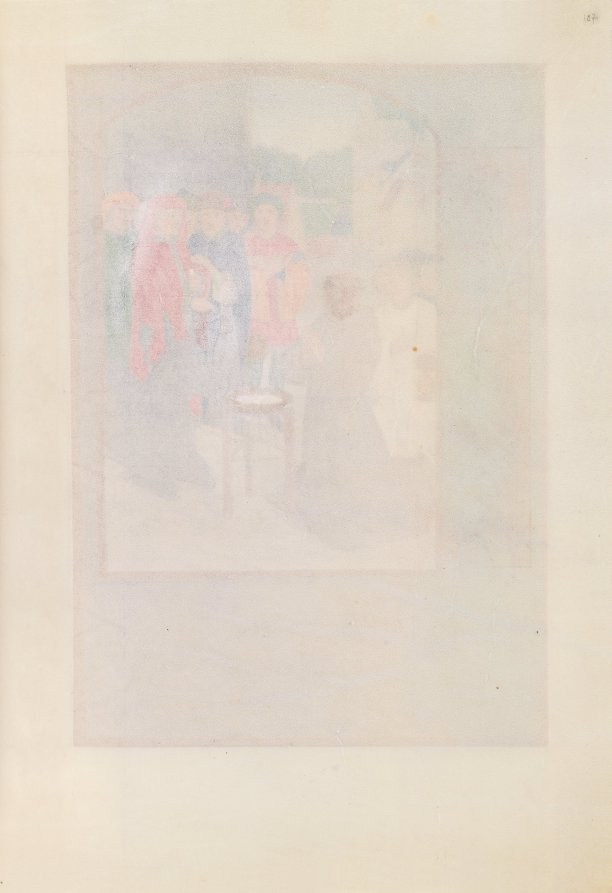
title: Hours of Queen Isabella the Catholic, Queen of Spain: Fol. 187r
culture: Flanders, Ghent and Bruges, late 15th century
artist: Master of the First Prayerbook of Maximillian (Flemish, c. 1444–1519)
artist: and Associates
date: c. 1500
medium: ink, tempera, and gold on vellum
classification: Bound Volume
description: This manuscript was illuminated by a circle of at least five highly organized manuscript painters active in the Flemish cities of Ghent and Bruges. The principal illuminator was Alexander Bening, who painted the majority of the book's miniatures. Manuscripts produced by this circle of artists are renowned for the decoration of their borders, which typically feature a rich variety of realistically-painted flowers, birds, and butterflies. This prayer book, called a book of hours, was intended not for a cleric, but for the private devotions of a lay person-in this case, Isabella the Catholic, Queen of Spain (1451-1504). Isabella's coat of arms embellishes the book's frontispiece. It is unlikely that the book was commissioned by the Queen herself; rather, she probably received it as a diplomatic gift from someone courting her patronage, perhaps Cardinal Francisco Jimenez de Cisneros. A Franciscan friar, Jimenez was dependent upon Isabella for his advancement, first to the post of Queen's confessor in 1492, and then to Archbishop of Toledo in 1495.